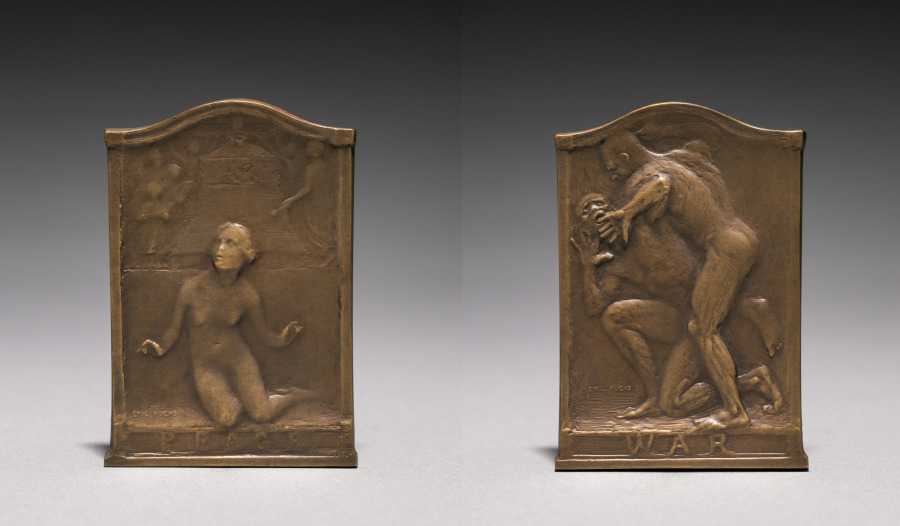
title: Plaquette: Peace and War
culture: America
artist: Emil Fuchs (American, born Austria, 1866–1929)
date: 1913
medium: bronze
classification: Metalwork